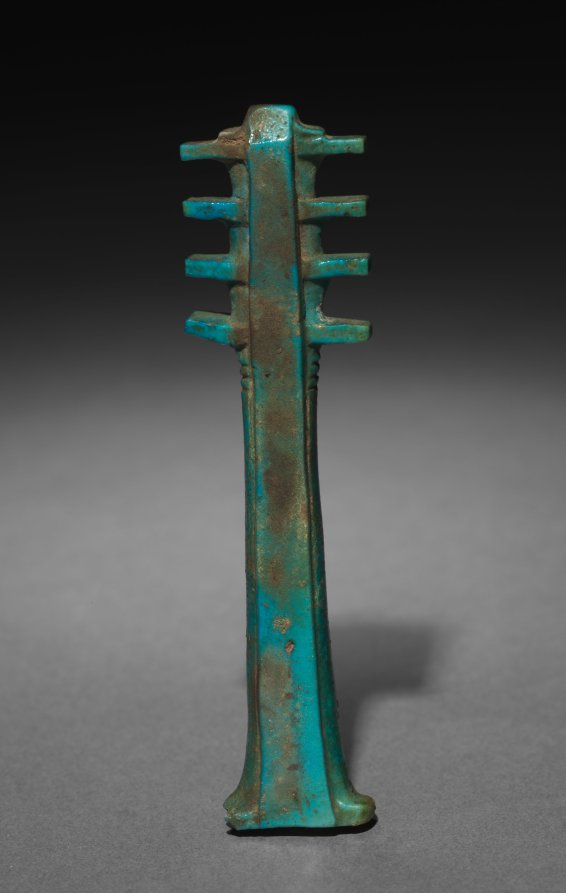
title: Djed-Pillar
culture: Egypt, Late period (715–332 BCE), Dynasty 26 or later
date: 664–525 BCE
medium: bright turquoise green faience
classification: Amulets